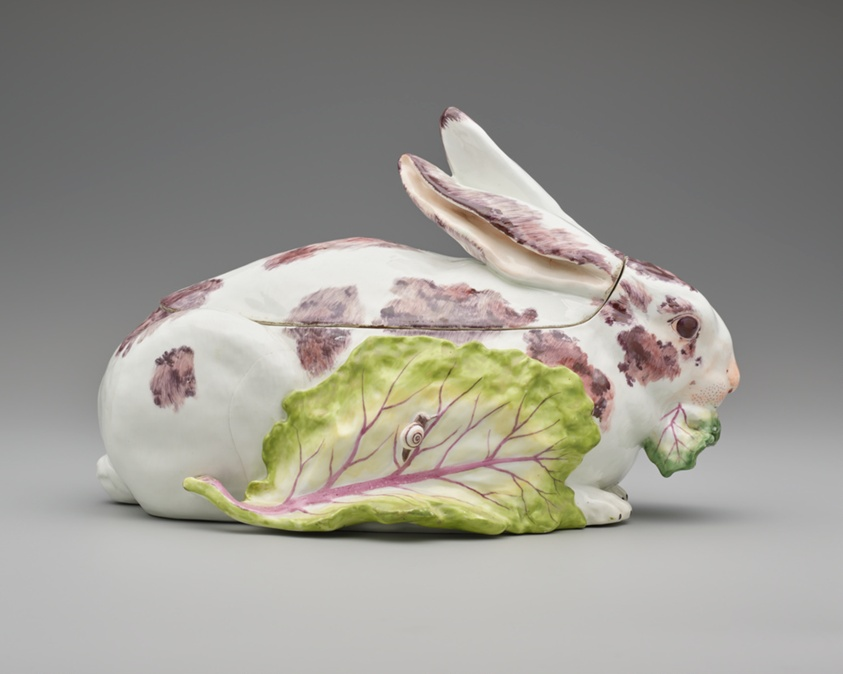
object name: Ceramics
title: Tureen in the form of a Rabbit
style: Rococo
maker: Chelsea Porcelain Manufactory; English, c. 1745–1784; London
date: 1755–56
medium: Soft-paste porcelain and polychrome enamels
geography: Chelsea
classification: tableware; porcelain; european decorative arts; ceramics